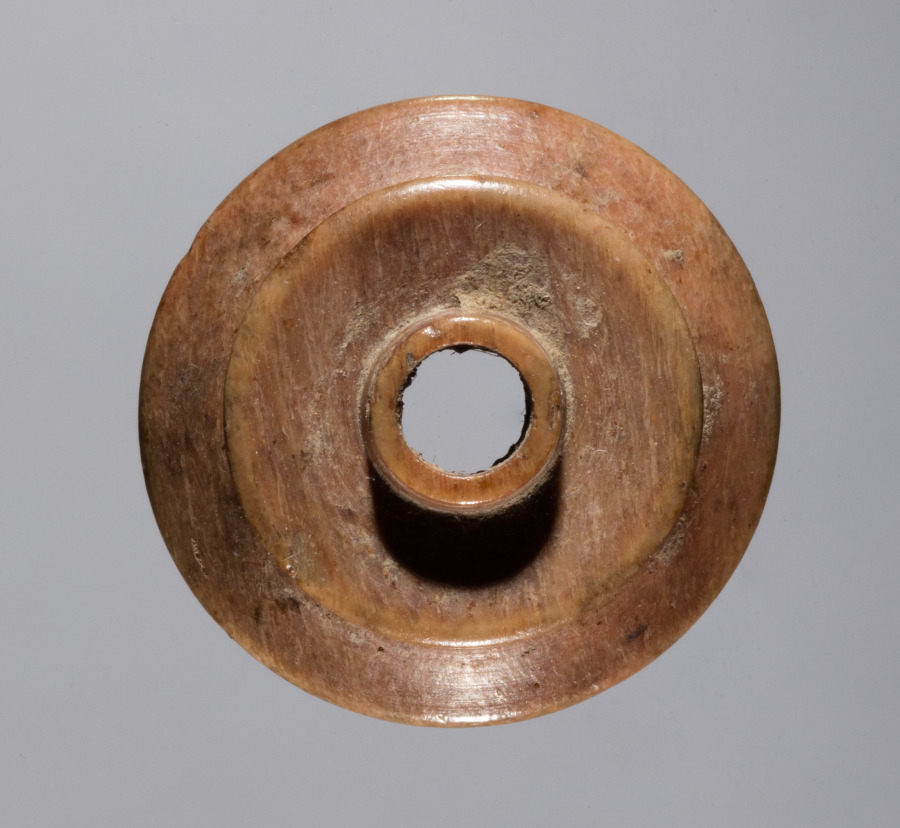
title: Spindle Whorl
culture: Iran, early Islamic period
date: 700s - 900s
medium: bone, incised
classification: Spindle Whorl